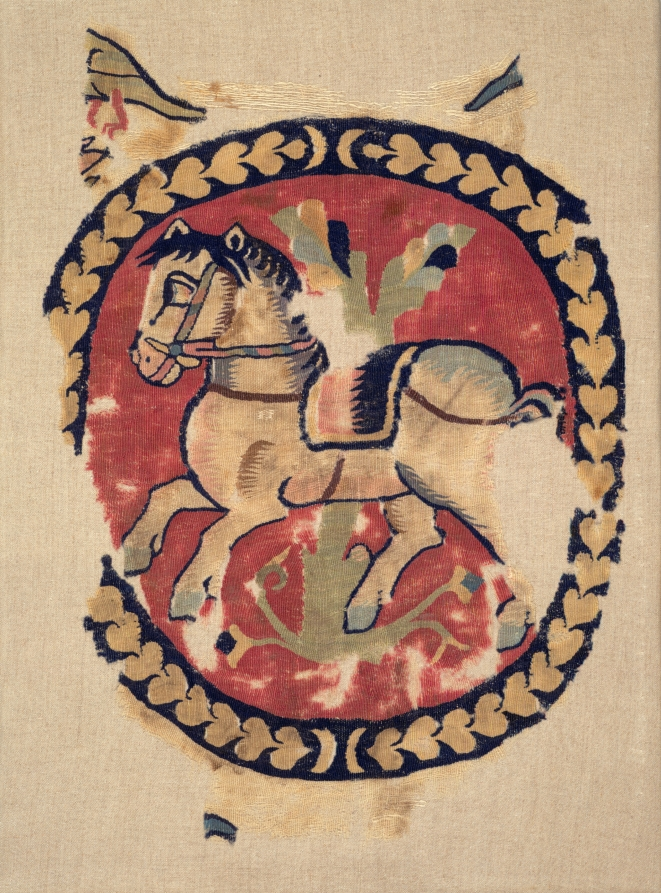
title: Curtain Fragment with Galloping Horse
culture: Egypt, Antinoë, Byzantine period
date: 500s CE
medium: plain weave (tabby) with inwoven slit-tapestry weave; wool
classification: Textile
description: Framed with hearts this large roundel displays a saddled horse galloping through a landscape, indicated by the stylized tree. The secondary motif of birds, partially visible in the corners, was repeated with the large roundels to form a colorful curtain. The many shades of color were skillfully achieved from only a few dyes, often the most expensive aspect of production: red and pink made from an insect dye, perhaps Armenian cochineal; blue from indigo; yellow and brown from fustic (a type of tree); green from fustic and indigo; and purple (horse’s mane) from the madder plant and indigo.